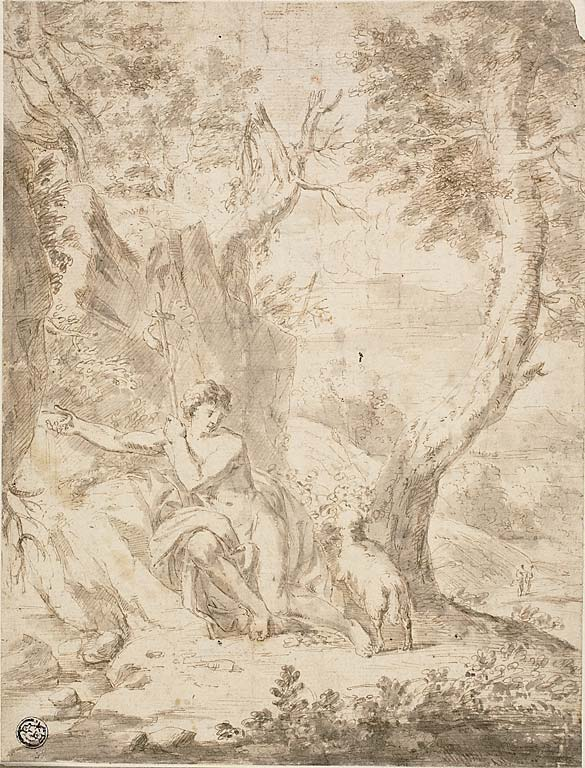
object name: Drawing and Watercolor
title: Saint John the Baptist in the Wilderness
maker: Possibly circle of or after Donato Creti (Italian, 1671-1749); or possibly Guido Reni (Italian, 1575-1642)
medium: Pen and brown ink with brush and gray wash, on ivory laid paper, laid down on ivory laid paper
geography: Italy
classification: ink or chalk wash; drawings (visual works); prints and drawing